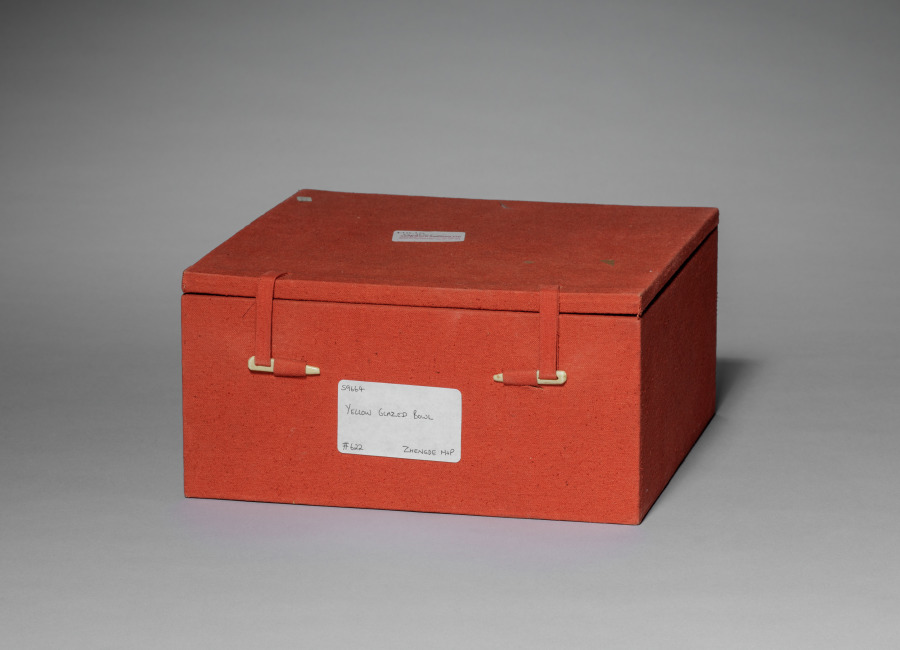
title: Yellow-Glazed Bowl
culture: China, Jiangxi province, Jingdezhen kilns, Ming dynasty (1368–1644), Zhengde mark and reign (1505–21)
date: 1505–21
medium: Porcelain with monochrome yellow glaze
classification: Ceramic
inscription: 大明正德年製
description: Monochrome yellow–glazed porcelain appears first during the Ming dynasty and is the combined result of technological advancement, the requirements of state rituals, and aspirations of taste. The base bears a mark of the Zhengde (正德) reign period, renowned for its high-quality imperial porcelain, and a pleasure-seeking emperor who died in his youth. Imperial marks were permitted to be applied only by Jingdezhen workshops affiliated with the court. Most scholars believe that yellow monochrome ware was reserved for the use of the imperial household or served as diplomatic gifts. The color is therefore often called “imperial yellow.”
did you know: Zhengde–marked bowls of this so-called imperial yellow type are also preserved in the National Palace Museum in Taipei and the Topkapi Saray, Istanbul, once the palace of the Ottoman sultans.